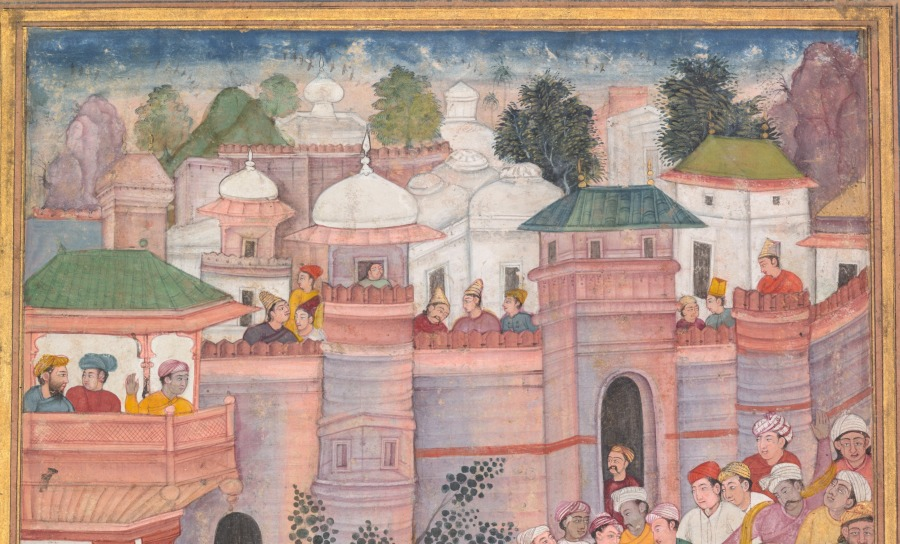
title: The game of wolf-running in Tabriz, from an Akbar-nama (Book of Akbar)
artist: Banavari 1 (Indian, active 1550s-1590s)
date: c. 1595–1600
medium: Gum tempera, ink, and gold on paper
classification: Painting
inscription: signed by Banwari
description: After four years of traveling in exile, fleeing Afghan forces, Humayun reached Tabriz, the glittering capital of the Safavid dynasty in northwestern Iran, here imaginatively rendered by the Indian artist. There the second Mughal emperor enjoyed warm hospitality extended by the shah of Iran, who called for a game of wolf-running for which the city was famous. Artists painting during the time of Akbar, late in his reign when historical subjects dominated, speculated as to how the game was played, based on eyewitness accounts. They gave the figures lively emotive expressions and gestures, and the dense crowding successfully conveys the pandemonium of the scene.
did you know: During extreme activities, turbans could come unwound and fall off.